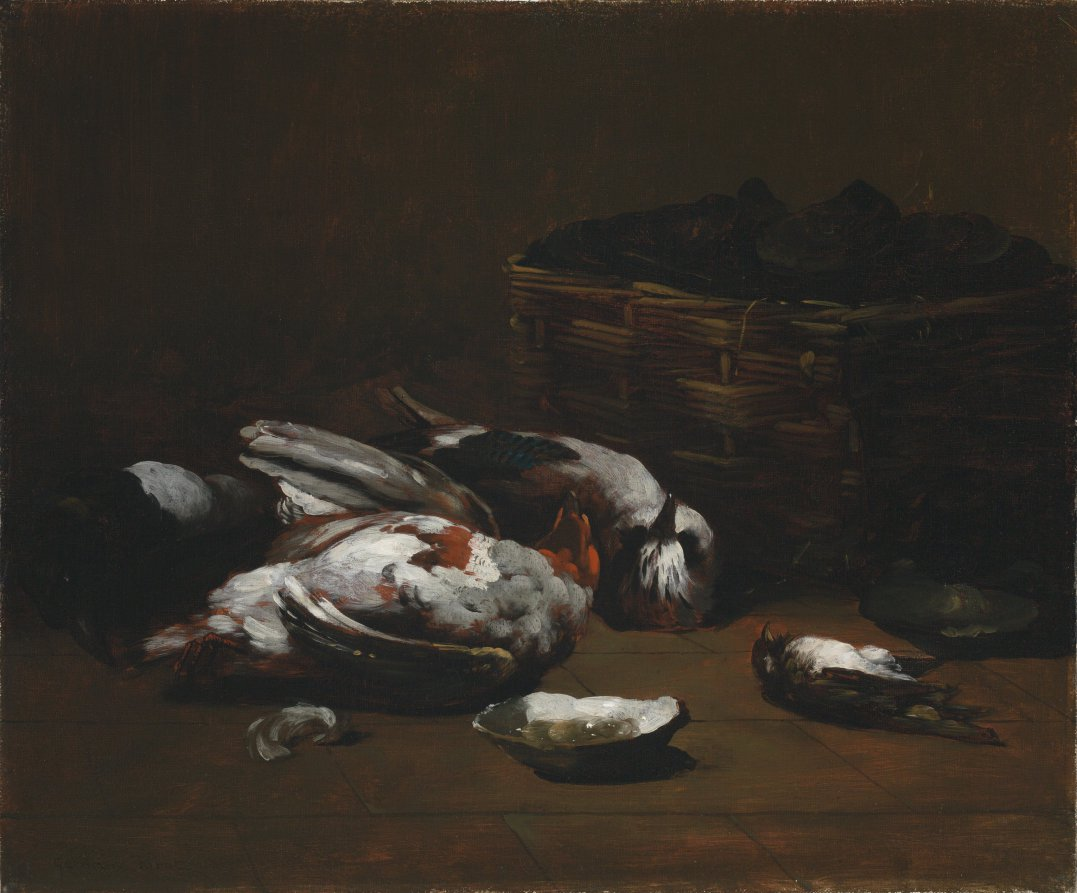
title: Still Life with Dead Birds and a Basket of Oysters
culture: France, 19th century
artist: Germain Ribot (French, 1845–1893)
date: c. 1860–80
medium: oil on fabric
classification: Painting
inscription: Signed lower left: Germain Ribot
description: Against a dark brown background, Ribot painted a basket filled with oysters. Light coming from the left is gently cast over the wicker basket. A dead magpie, with its white chest and long black beak, emerges from the shadows at the left. This bird, along with the partridge in the foreground, the jay toward the back, and what appears to be a sparrow at the right, are probably located in a kitchen, where preparations for cooking will soon begin. Germain Ribot, who painted genre (everyday life) scenes and still lifes, was the son of the more famous Théodule-Augustin Ribot (1823-1891), known for his working-class and peasant subjects.